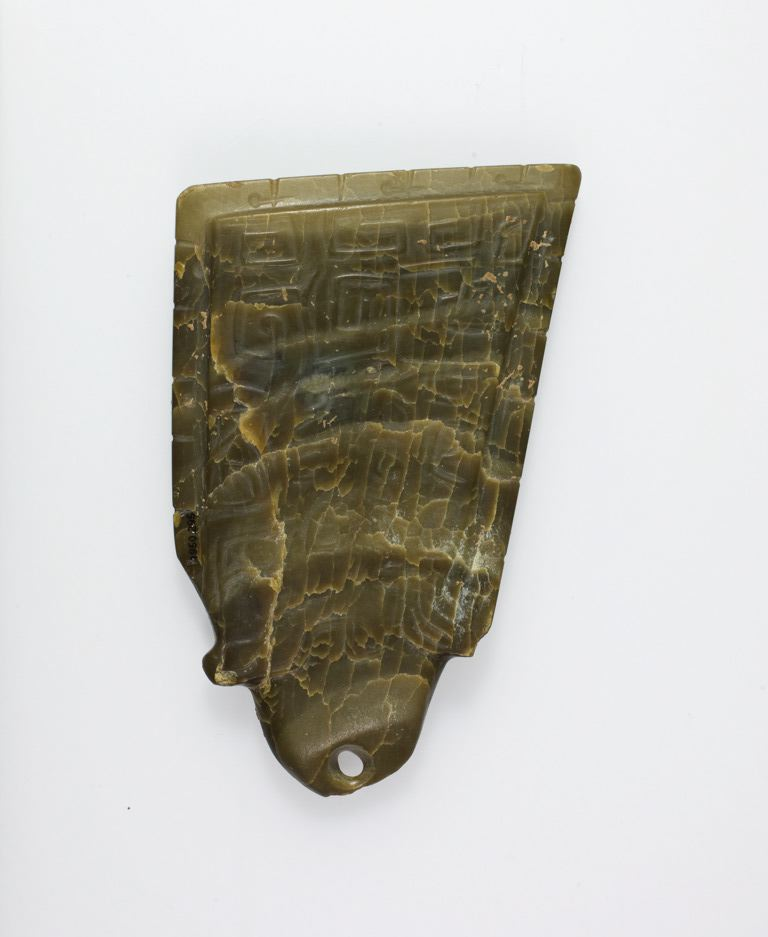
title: Fitting, with double-line incised motif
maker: China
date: Shang dynasty (c. 1600–1050BC)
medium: Jade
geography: China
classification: jade; asian art